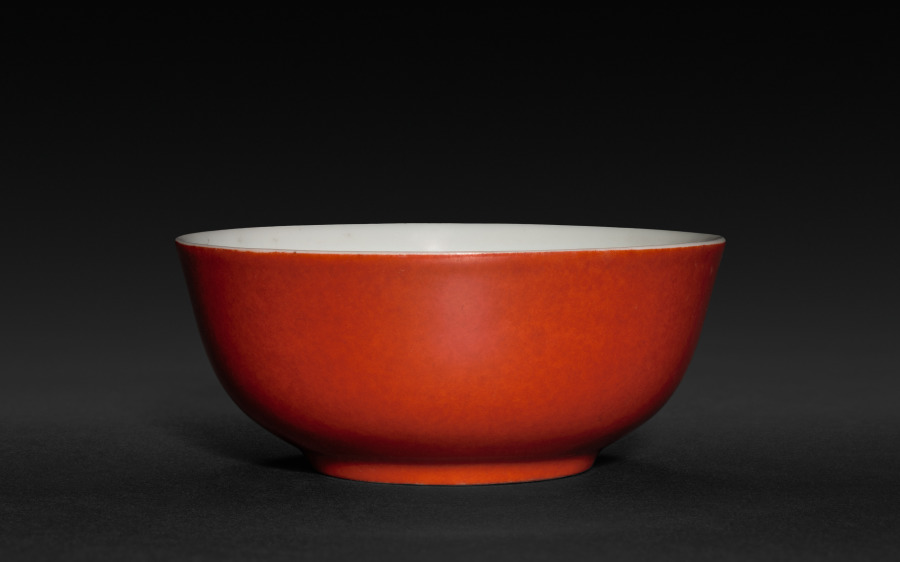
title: Bowl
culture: China, Jiangxi province, Jingdezhen kilns, Qing dynasty (1644-1911), Yongzheng reign (1722-35)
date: 1723–35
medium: porcelain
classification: Ceramic